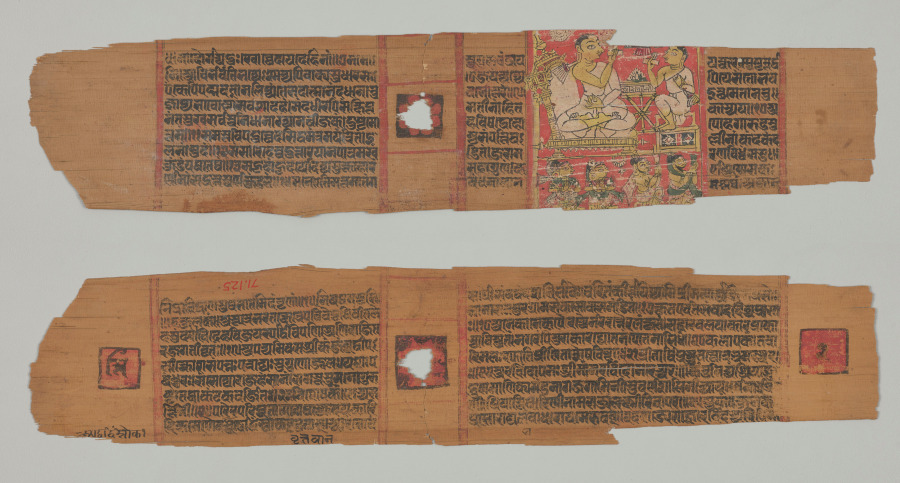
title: Folio 2 from a Parshvanatha Charitra (Life and Stories of Lord Parshva) of Bhavadeva-suri: Monk preaching to a disciple with a lay audience (recto); Text (verso)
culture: Western India, Gujarat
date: c. 1275–1300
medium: Gum tempera and ink on palm leaf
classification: Painting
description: This leaf comes from the beginning of a manuscript about the life and nine past lives of the penultimate Jina (liberated being in the Jain religion), known as Parshva. Composed by a learned Jain monk in 1255, it opens with praises exalting the Jinas. This manuscript was produced not long after the text gained popularity, since the style of the painting accords with others made during the third quarter of the 13th century. The language of the text is Sanskrit with the incorporation of numerous elements drawn from regional vernaculars.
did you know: The hole in the center of the page was meant for binding cords to pass through.